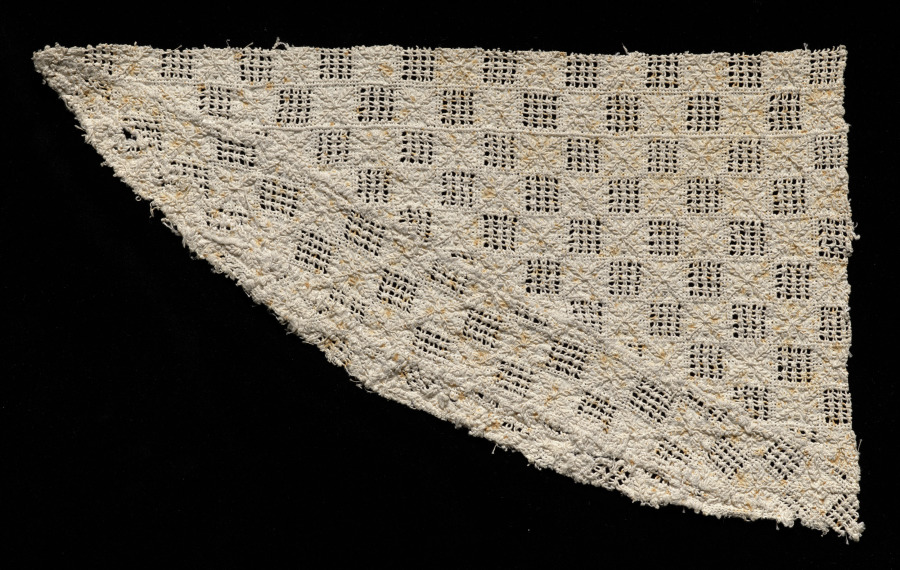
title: Lace fragment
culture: Italy, Venice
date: 1500s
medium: Linen: needle lace (cutwork and reticella) and embroidery; curl stitch (punto riccio)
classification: Lace